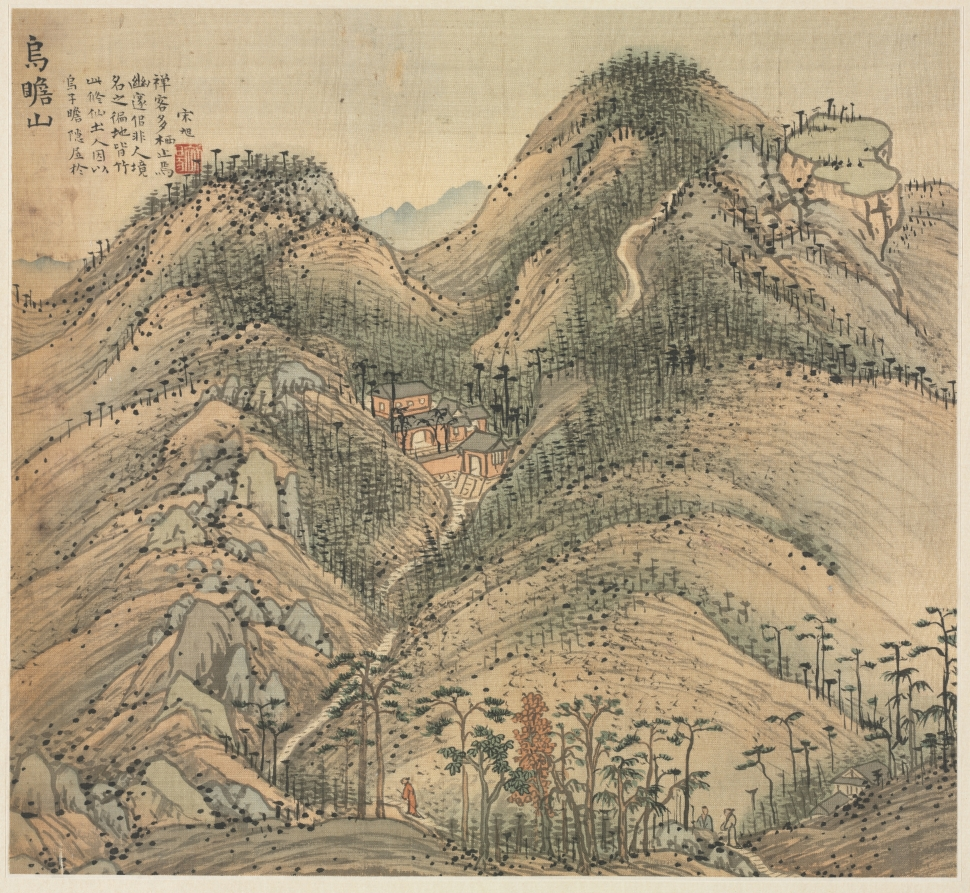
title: Mt. Wuzhan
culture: China, Jiaxing, Ming dynasty (1368–1644)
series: Eighteen Views of Huzhou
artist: Song Xu (Chinese, 1525-c. 1606)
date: c. 1588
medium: Album leaf; ink and color on silk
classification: Painting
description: By the 1500s, visits to historic and scenic sites in the lower Yangzi delta stimulated an increase of printed illustrated travel books. Topographical depictions of local scenery flourished. Leaves from this album illustrates sites around Lake Tai of the two adjacent counties Changxing and Wuxing (modern Huzhou). Song Xu, who lived intermittently in Jiaxing and Songjiang, must have passed through Wuxing by boat and thus knew the region. The paintings are inscribed with gazetteerlike notations, suggesting that the album was produced for clients as commemorative works, a travel guide, or for “armchair travel” (woyou) in one’s mind.